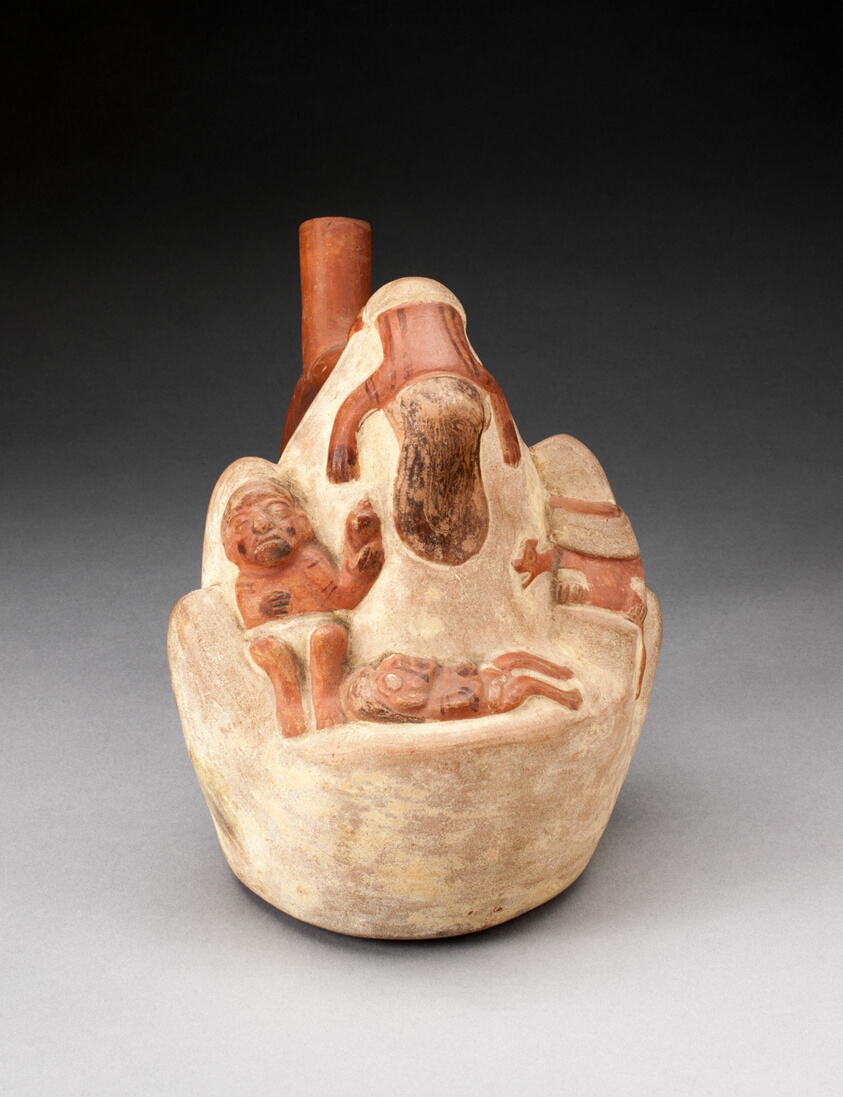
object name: Vessel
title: Handle Spout Vessel in the Form of a Mountain with Deceased Human Figures and Animals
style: moche, mochica iii, mochica, early intermediate period, Pre-Columbian, americas, Arts of the Americas, andean, andes, south american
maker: Moche (North coast, Peru)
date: 100 BCE–500 CE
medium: Ceramic and pigment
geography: Peruvian North Coast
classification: earthenware; art of the americas; ceramics; vessel